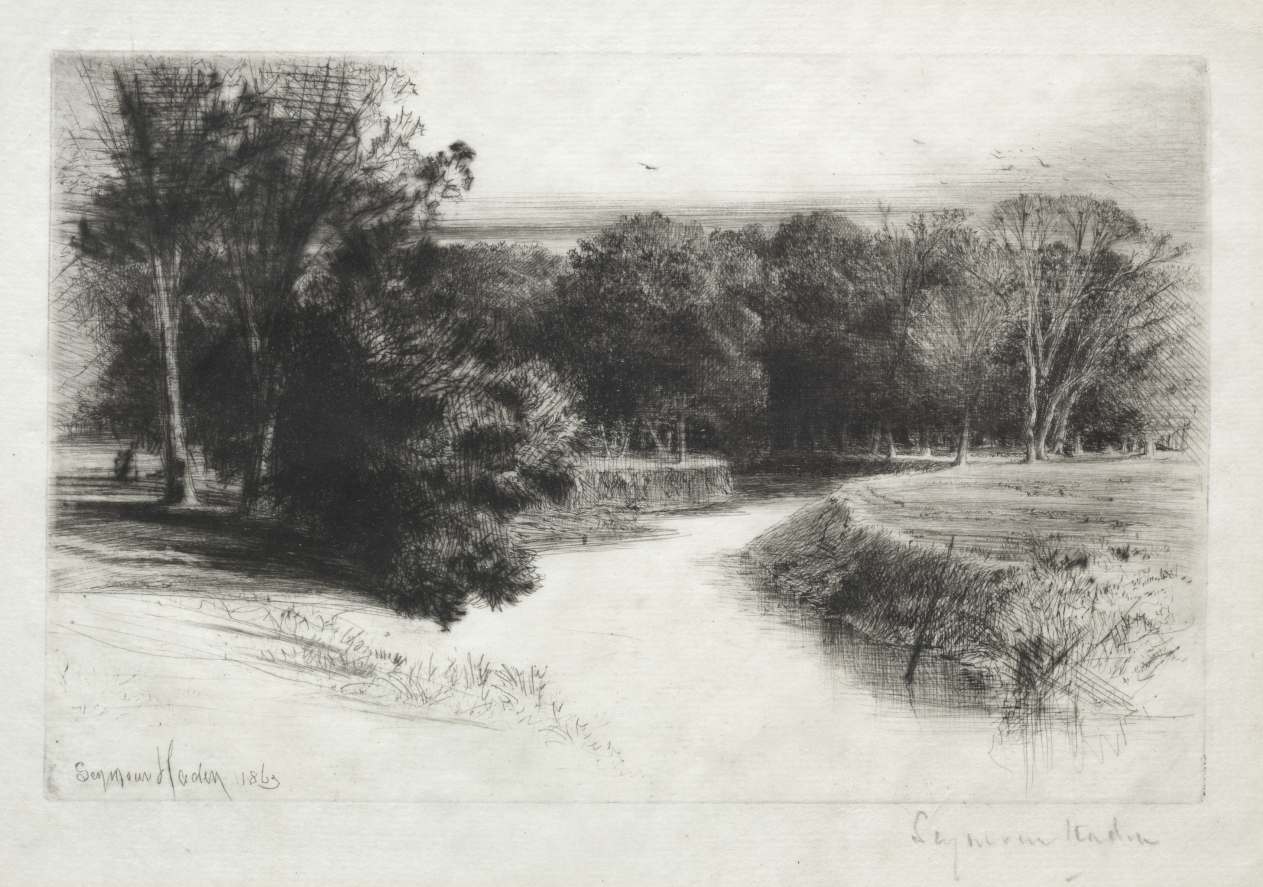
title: A Sunset in Ireland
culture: England, 19th century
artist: Francis Seymour Haden (British, 1818–1910)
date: 1863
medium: etching and drypoint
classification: Print